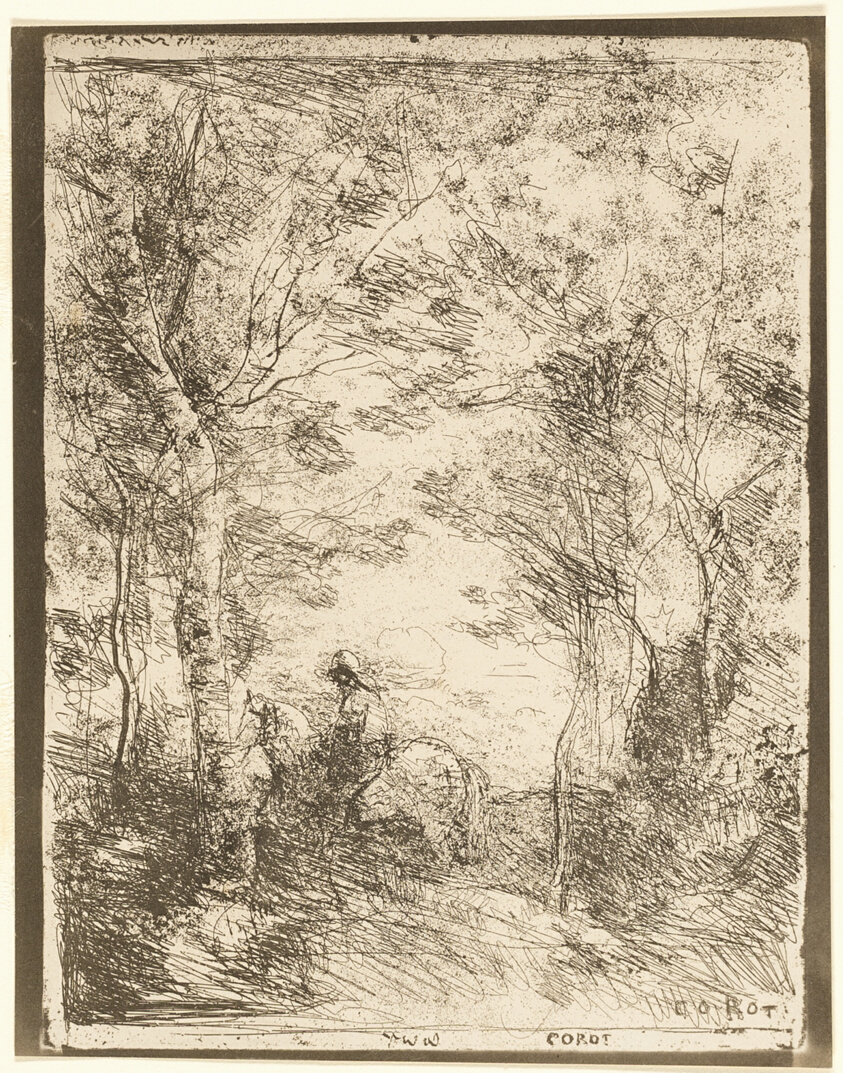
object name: Print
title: The Rider in the Woods, small plate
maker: Jean-Baptiste-Camille Corot; French, 1796-1875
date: 1854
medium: Cliché-verre on ivory photographic paper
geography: France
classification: cliché-verre; print; prints and drawing